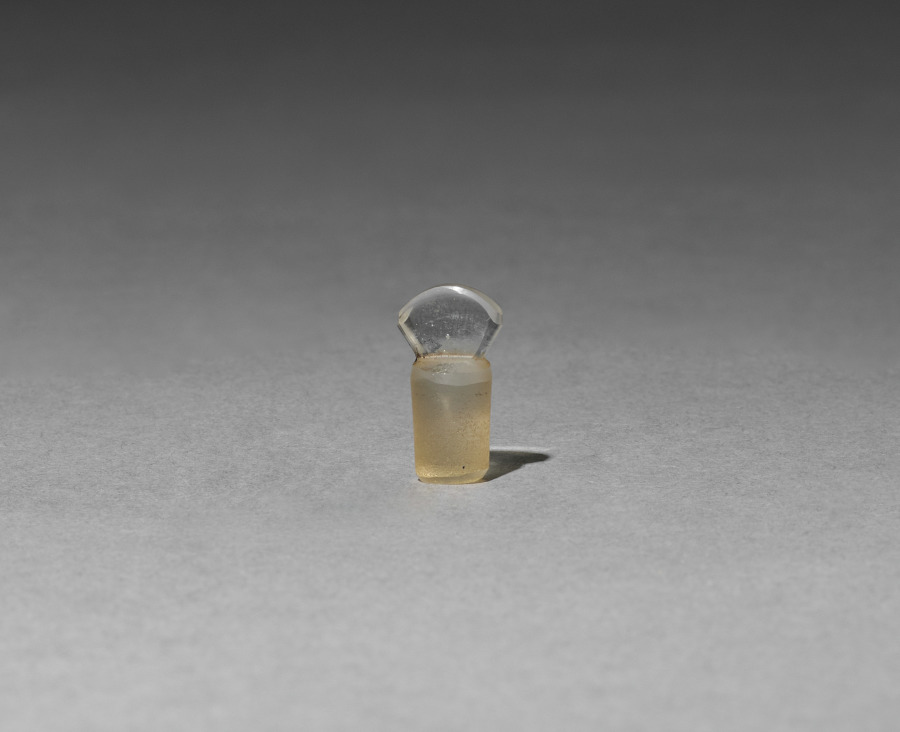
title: Stopper for a Scent Bottle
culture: Germany (?)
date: 1800s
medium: blue-gray opaline glass mounted in gold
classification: Miscellaneous